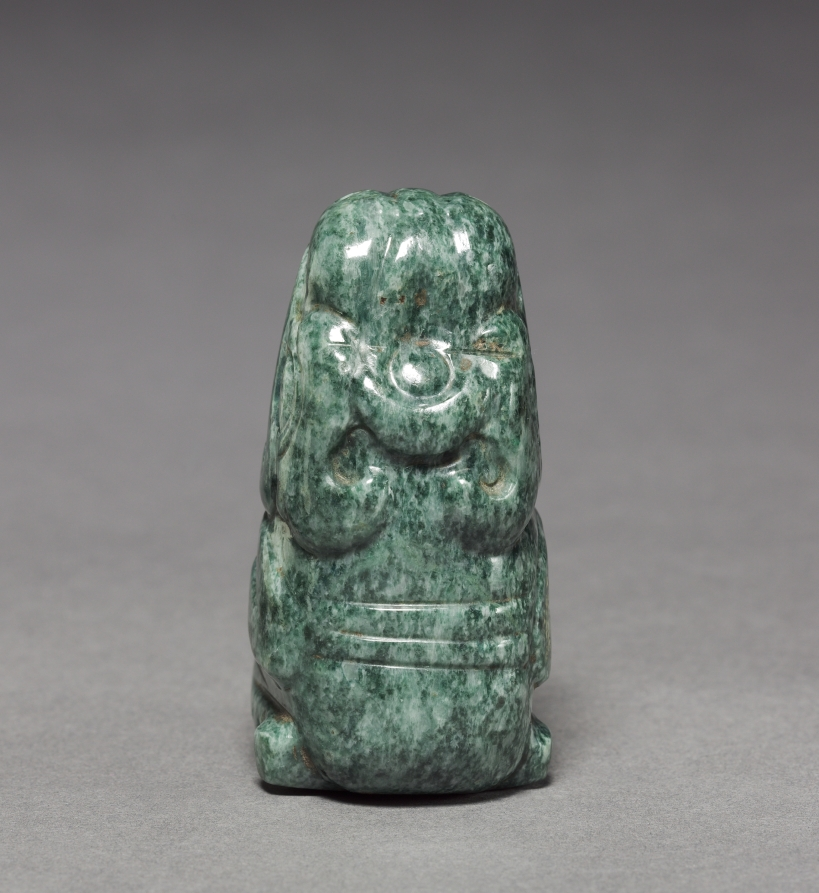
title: Female Figurine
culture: Central Mexico, Aztec, Post-Classic Period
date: 1325–1519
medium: jadeite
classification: Stone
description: Seated in typical female posture, this figurine probably represents an Aztec goddess or ritual impersonator. She wears a monster headdress, but her costume is simple, making specific identification difficult.